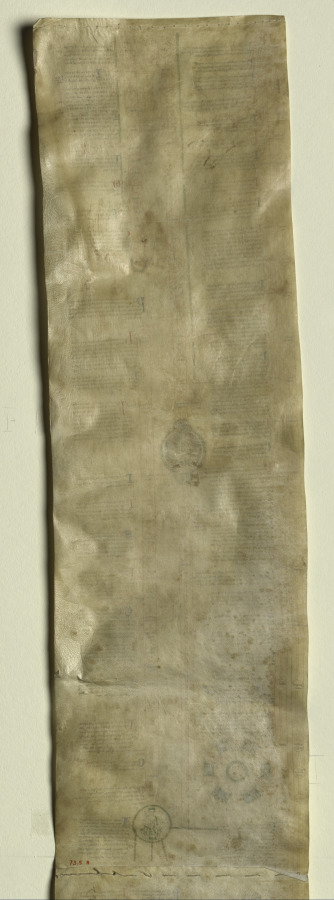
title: Peter of Poitiers's "Compendium Historiae in Genealogia Christi"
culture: England, Canterbury, 13th century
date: c. 1220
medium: ink and tempera on a vellum roll of four membranes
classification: Manuscript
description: This manuscript roll, composed of four membranes formerly stitched together in a continuous roll about nine feet long, has been divided in the middle for easier visibility and study. The text is an abridgment of biblical history focused on the descent of Christ from Adam. It was written by Peter of Poitiers (about 1130–1205), who taught theology and history in Paris and was widely copied. The present roll is an English copy of Peter's text made shortly after his death. Although manuscript rolls were hung on the walls of a classroom as instructional aids to students, some of them have value beyond their textual and historical interest because of the fine quality of their drawings, as seen here. A comparison with Canterbury manuscripts and stained glass of around 1220 is the basis for the attribution to Canterbury. Peter of Poitiers's aim in this project was to assist students prevented from mastering biblical history because of its length and because they were too poor to own books. His text on roll is the briefest possible summary of biblical history. It is arranged in six historical stages, denoting the six ages of the world, as decreed by theological tradition. The first five ages were inaugurated by Old Testament individuals: Adam, Noah, Abraham, David, and Sedecias. The birth of Christ heralded the sixth stage. Beginning at the top of the first membrane, the text consists of brief biographical entries on the ancestors of Christ (Adam, Noah, Abraham, Moses, and David) and other biblical personalities. These extend to the birth of Christ on the fourth membrane, ending with accounts of Hebrew and Roman kings and the Apostles. Each compendium shows the names of the ancestors inscribed within circles, those of direct descent placed vertically in a central column, others scattered in clusters to the right and left. The decoration of the roll consists of a series of medallions of diverse geometrical frames filled with either a figural drawing or a diagram. The style of these pen-and-ink drawings, some illuminated in tempera or tinted with wash, stems from English manuscript and glass painting attributed to the school of Canterbury Cathedral. The style of the museum's illustrations is so close to the stained glass panels made for Trinity Chapel at Canterbury (about 1220) to suggest that an artist active as a glazier in the Cathedral workshop may also have executed the manuscript. In the least, the painter of the roll manuscript was familiar with the style of the painted glass, and on this basis, a date of about 1220 seems appropriate. Additional evidence is supplied by a psalter illuminated at Canterbury shortly before 1220. The figurative scenes in this psalter were apparently illustrated by the same hand that executed the line and wash drawings in the museum's roll.